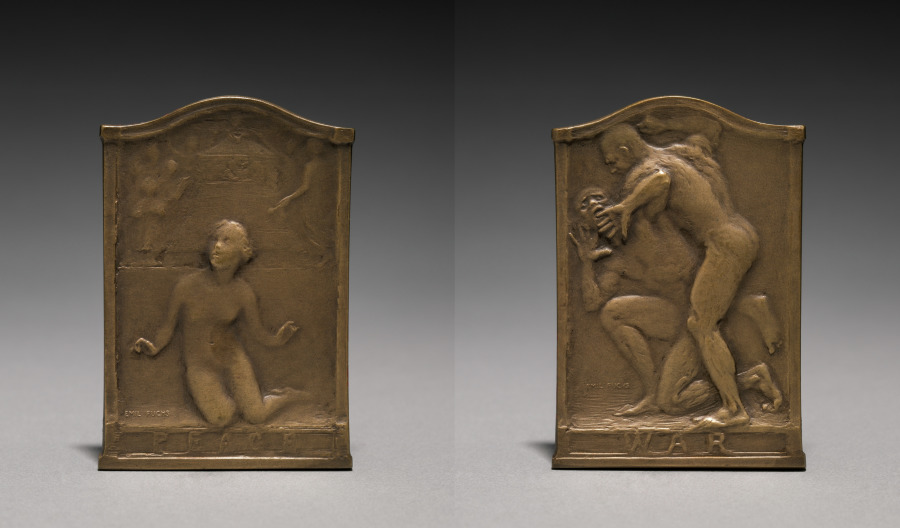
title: Medal: Commemorates the Signing of Peace, No. 39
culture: America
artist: Emil Fuchs (American, born Austria, 1866–1929)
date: 1918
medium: bronze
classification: Metalwork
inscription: "PEACE."